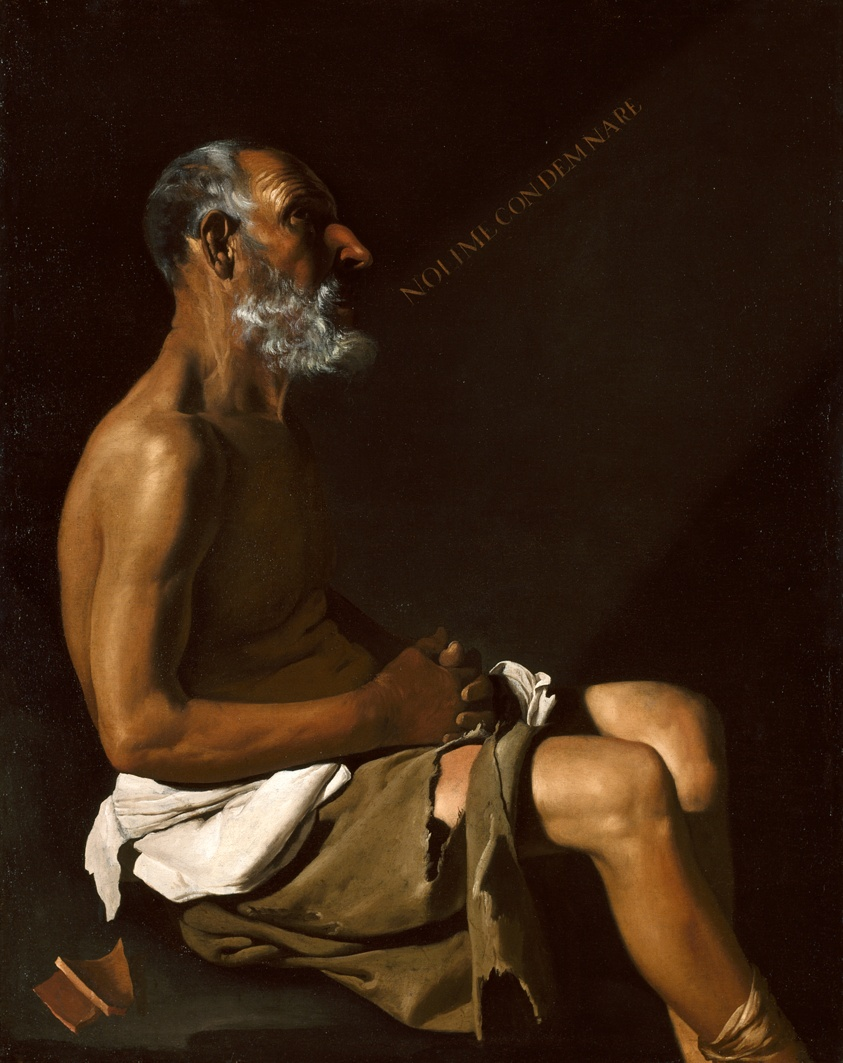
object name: Painting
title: Job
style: 17th Century, Baroque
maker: Spanish; possibly Seville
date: 1618/30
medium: Oil on canvas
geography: Spain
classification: oil on canvas; spanish; paint; oil paintings (visual works); painting; european painting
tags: biblical, religious figures, religion, man, Devotion